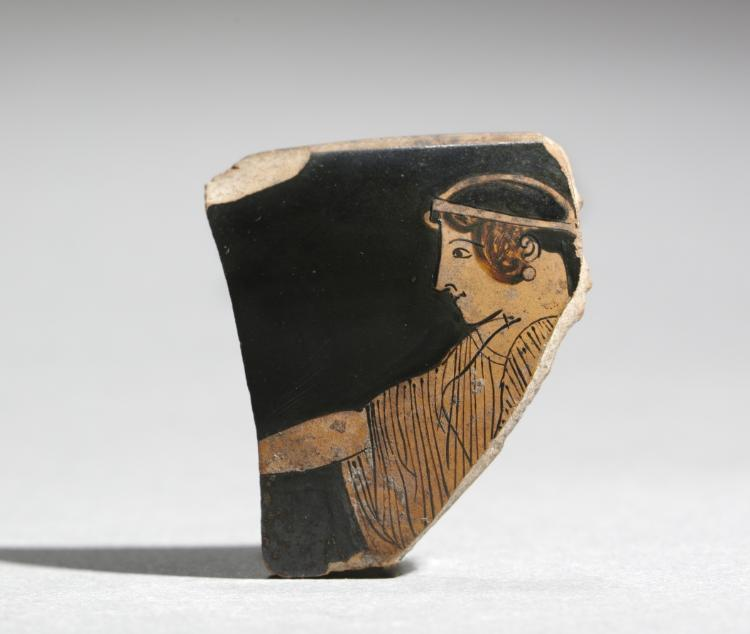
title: Fragment from Red-Figure Cup: Woman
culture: Greek, Attic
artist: near the Telephos Painter (Greek, Attic, active 480–460 BC)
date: c. 470–460 BCE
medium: ceramic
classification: Ceramic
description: A bit of preserved lip shows that this fragment comes from a kylix, or drinking cup. A finely dressed woman, with earring and headband, reaches out with her right hand, now lost but once holding a wreath in added red paint. Relief lines standing above the surface outline the face, neck, arm, and other details.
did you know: Painted on the back side of this fragment is ORVIETO, its likely findspot more than a century ago.